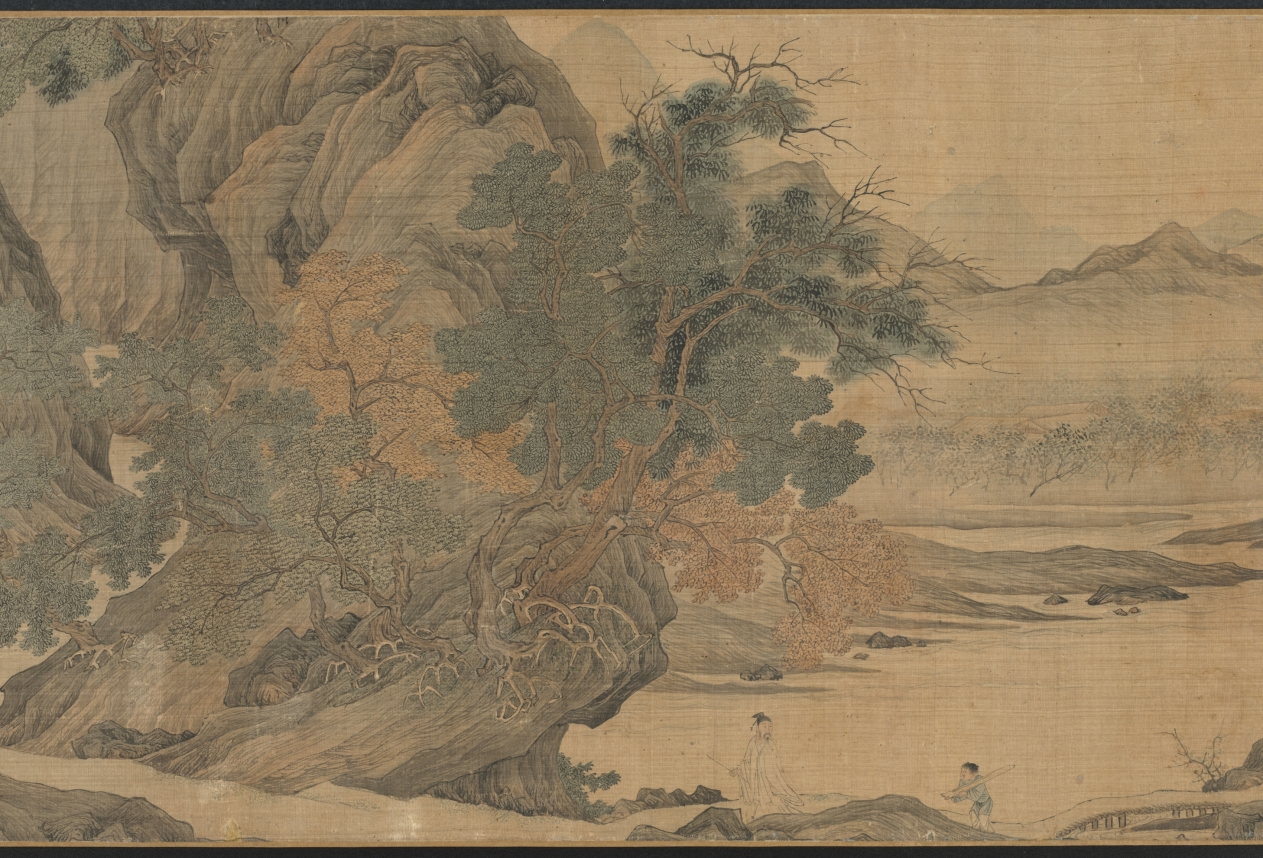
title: Scholar-Hermits in the Autumn Mountains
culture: China, Ming dynasty (1368–1644)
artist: Tang Yin (Chinese, 1470–1523)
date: 1500–1510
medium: handscroll, ink and light color on silk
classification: Painting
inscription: Artist's signature and 2 seals at end of scroll: Tang Yin [seals] T'ang Po-hu; T'ang Tzu'wei t'u-shu.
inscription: Title on frontispiece by Li Cho-kung (dates unknown).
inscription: 1 colophon and 11 additional seals: 1 colophon dated 1915 of Wu Tso-hsi (19th-20th c.); 2 seals of Gao Qifeng 高奇峰 (1889–1933); 5 seals of C. C. Wang 王季遷 (1907–2003); 4 seals unidentified.